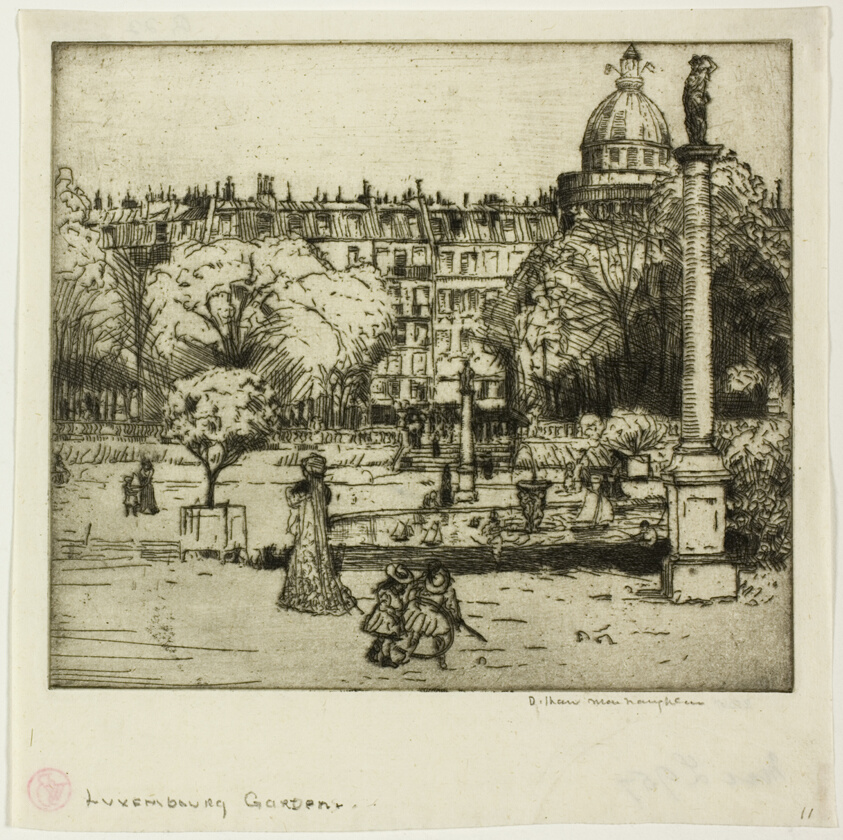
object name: Print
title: Luxembourg Gardens, Paris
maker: Donald Shaw MacLaughlan (American, born Canada, 1876-1938)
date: 1900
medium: Etching in black on cream wove paper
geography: United States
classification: etching; print; prints and drawing